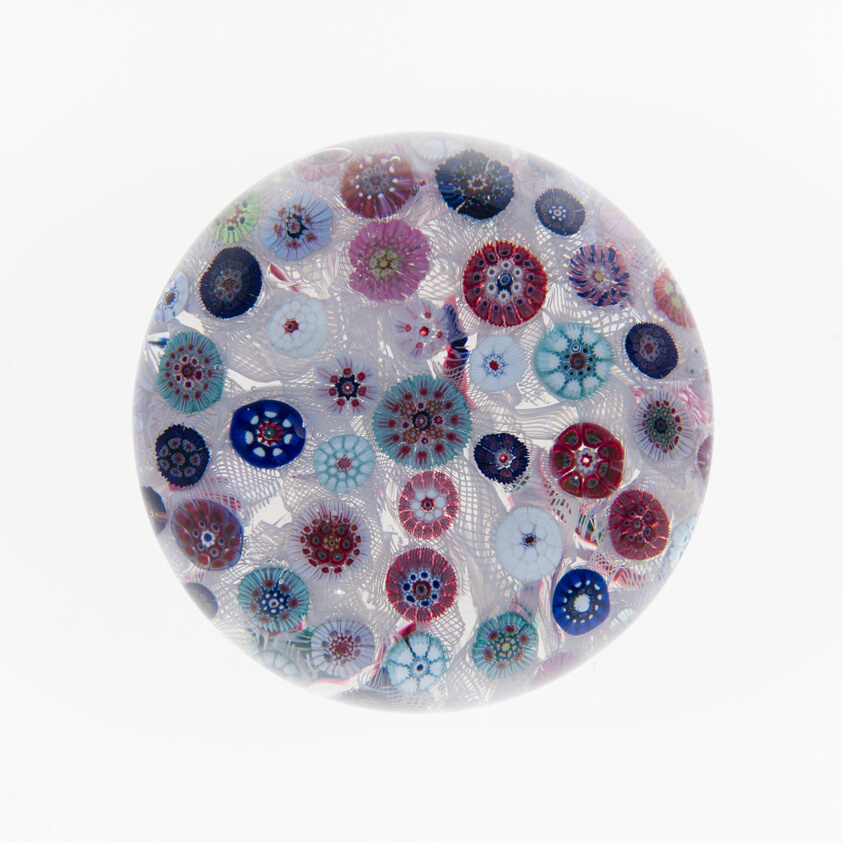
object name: Glass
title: Paperweight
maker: Saint-Louis Glassworks (Cristalleries de Saint-Louis); Lorraine, France, founded 1586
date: c. 1845–55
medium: Glass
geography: Saint-Louis-lès-Bitche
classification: paperweight; glass